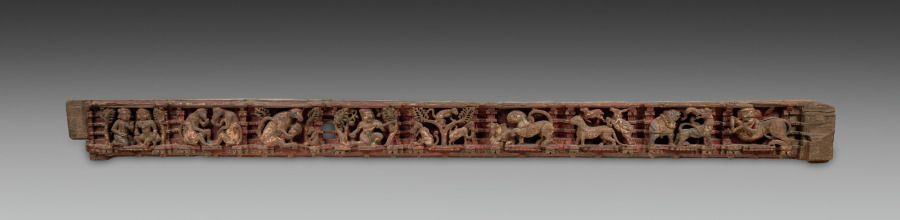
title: Narrative Frieze: Forest Retreat with Animals - Architrave from a Jain Temple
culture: India, Gujarat, 16th-17th century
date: 1500s–1600s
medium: wood with traces of color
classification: Sculpture